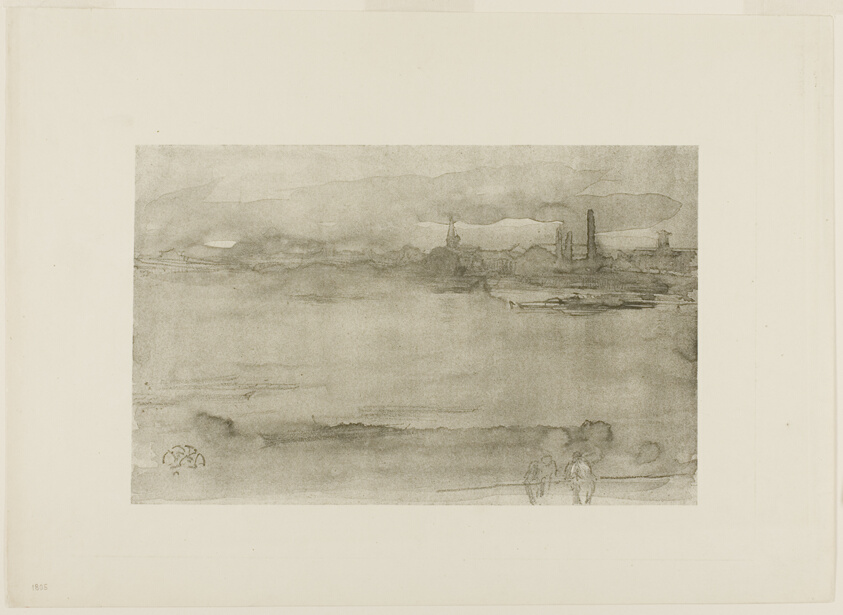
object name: Print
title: Early Morning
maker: James McNeill Whistler (American, 1834-1903)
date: 1878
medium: Lithotint in black ink, with scraping, on a prepared half-tint ground, on cream wove proofing paper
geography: United States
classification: lithotint; lithograph; print; prints and drawing; paper